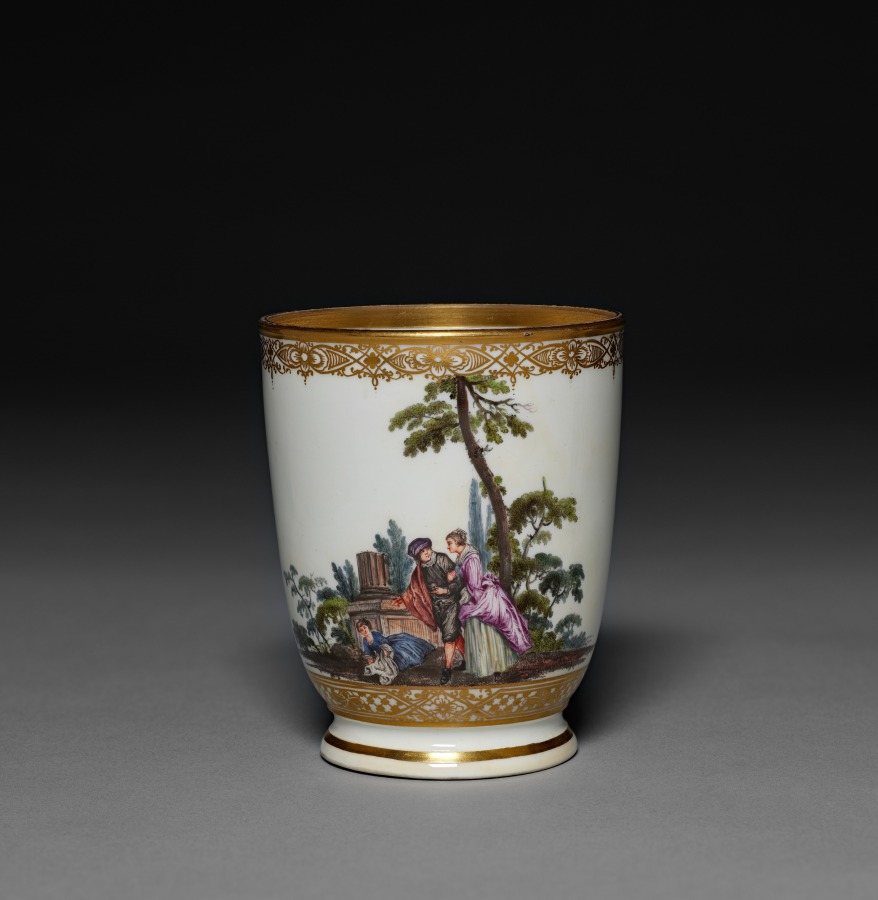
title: Beaker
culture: Germany, Meissen, 18th century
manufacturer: Meissen Porcelain Factory (German, est. c. 1710)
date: c. 1745–1750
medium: porcelain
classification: Ceramic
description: In an effort to rejuvenate its style of decoration, the Meissen factory acquired a large group of French engravings about 1740. During the next decade, figural decorations in the style of Antoine Watteau and his followers became a typical mode of decoration on Meissen pporcelain.